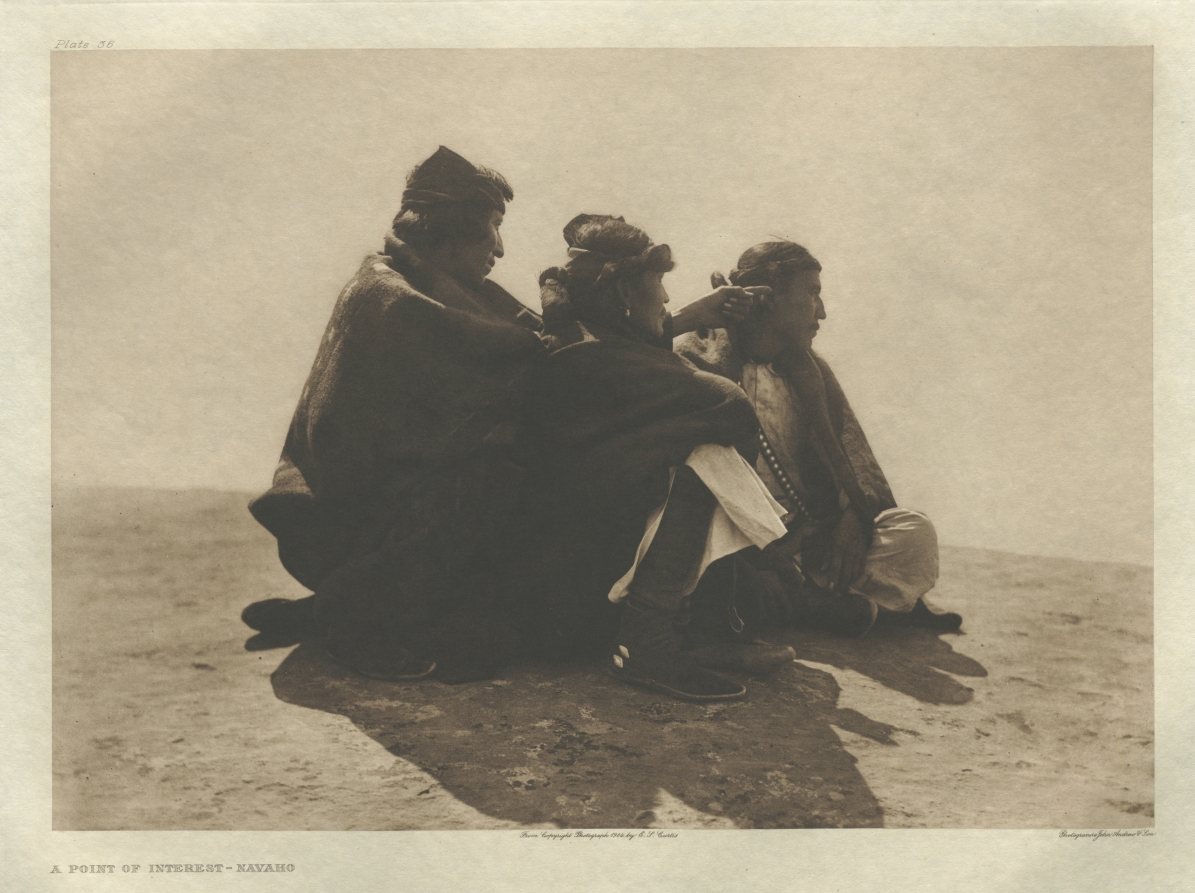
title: Portfolio I, Plate 36: A Point of Interest-Navaho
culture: America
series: The North American Indian: being a series of Portfolios picturing and describing the Indians of the United States, the Dominion of Canada, and Alaska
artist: Edward S. Curtis (American, 1868–1952)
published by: The University Press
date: 1904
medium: photogravure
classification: Portfolio